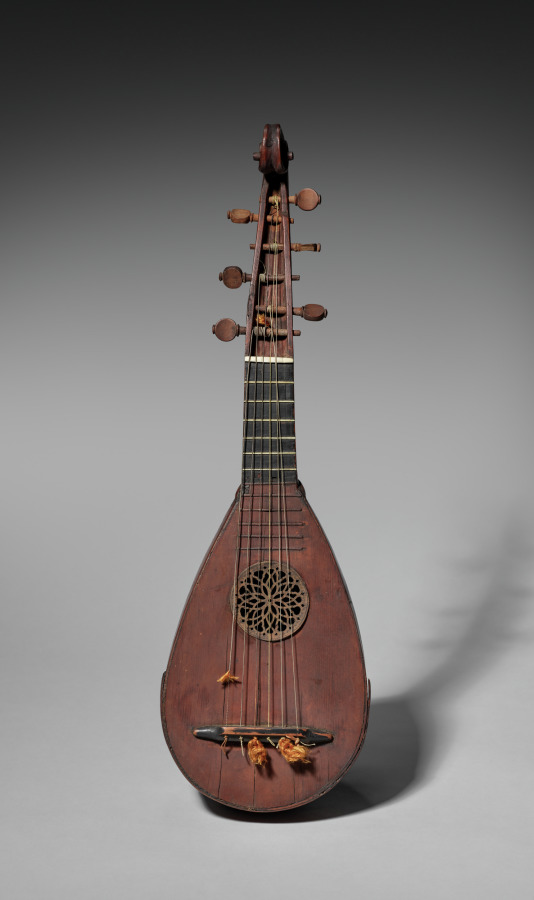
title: Pandurina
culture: Italy, 15th century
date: 1400s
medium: varnished wood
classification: Musical Instrument